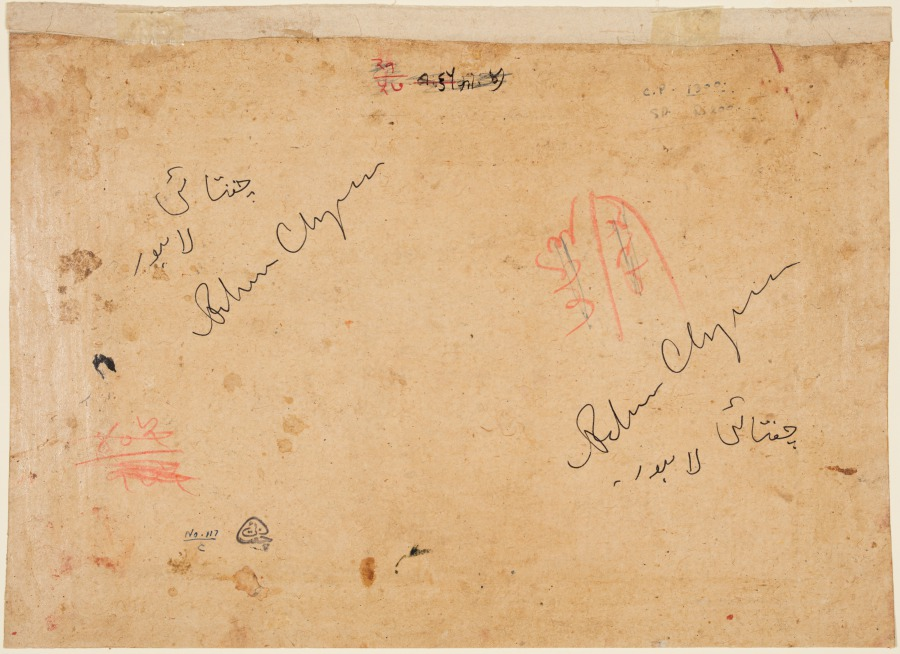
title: Sultan Ibrahim ibn Adham of Balkh Visited by Angels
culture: Northwestern India, Rajasthan, Rajput Kingdom of Bundi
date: c. 1740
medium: gum tempera and gold on paper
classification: Painting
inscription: Verso: Udaipur inventory 21/57 Chughtai signature in both Urdu and English Chughtai seal and number 117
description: Sultan Ibrahim ibn Adham was the King of Balkh in present-day Afghanistan, born around 730, but later abdicated his throne to take up ascetic life in Syria. Sufi legends claim that Ibrahim in the wilderness was fed by angels. In the painting, Ibrahim can be seen in a cave and meditating under a tree, while five angles appear in front of him.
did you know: Two of the angels bring bottles of wine.